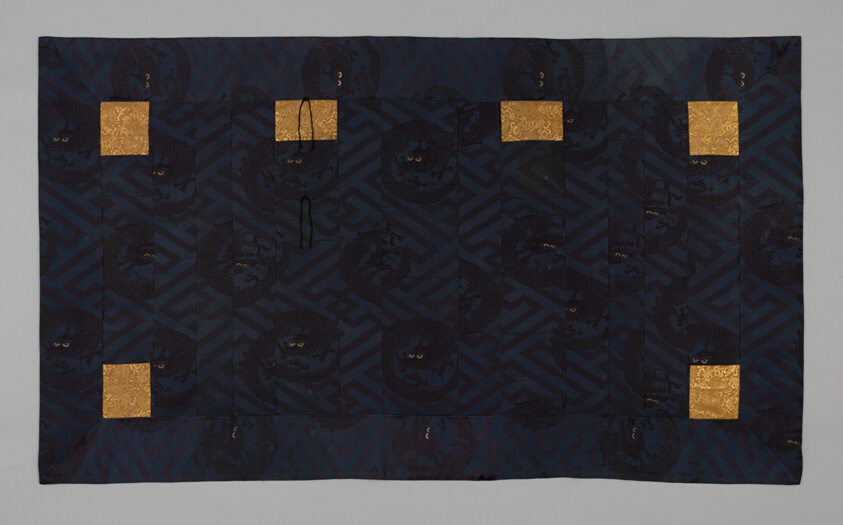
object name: Textile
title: Kesa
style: late edo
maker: Japan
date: late Edo period (1789–1868), c. 1850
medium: Hiri, yô, jô: Silk and gold-leaf-over-lacquered-paper-strip wrapped silk, warp-float faced 2:1 'Z' twill weave with plain interlacings of secondary binding warps and supplementary patterning and brocading wefts; shiten and niten: Silk and gold-leaf-over-lacquered-paper-strip, warp-float faced 2:1 'Z' twill weave with weft-float faced 1:2 twill interlacings of secondary binding warps and supplementary patterning wefts; lining: silk, 4:1 satin damask weave; stenciled, resist-dyed and painted (tsutugaki-zome); interlining: cotton, plain weave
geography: Japan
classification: textile; weaving - printed; weaving; liturgical - buddhist